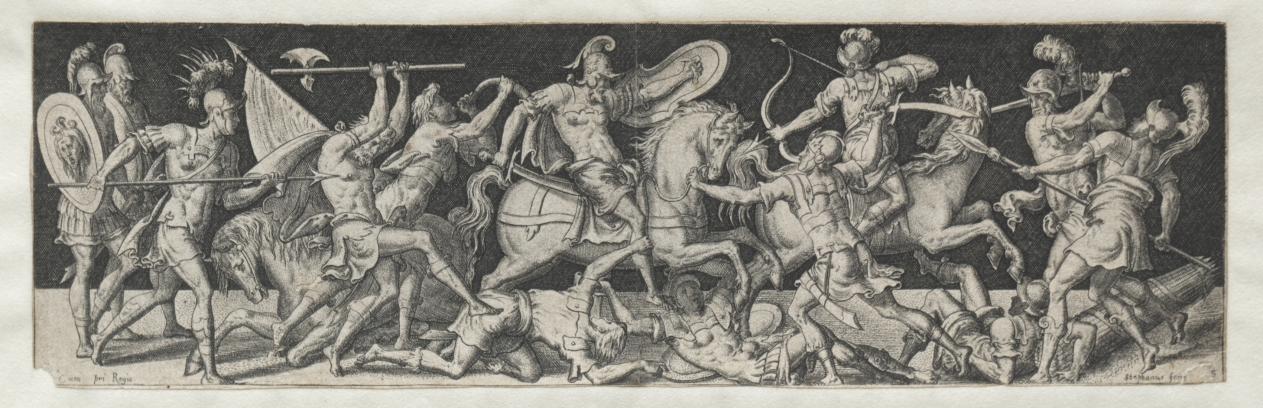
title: Combats and Triumphs No. 12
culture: France, 16th century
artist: Etienne Delaune (French, 1518/19-c. 1583)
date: c. 1550–72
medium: engraving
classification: Print